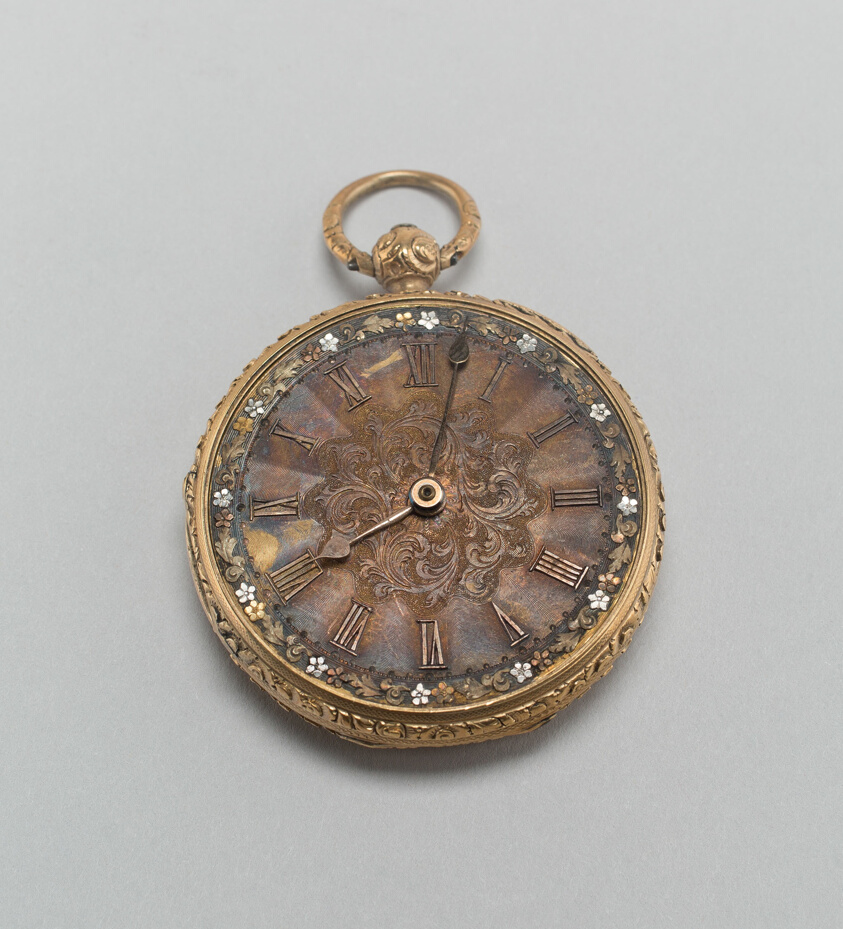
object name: Metalwork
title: Watch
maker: John Harrison (English, 19th century)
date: 1824/29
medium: Gold and brilliants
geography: England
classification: gold; metal; watch; european decorative arts; metalwork